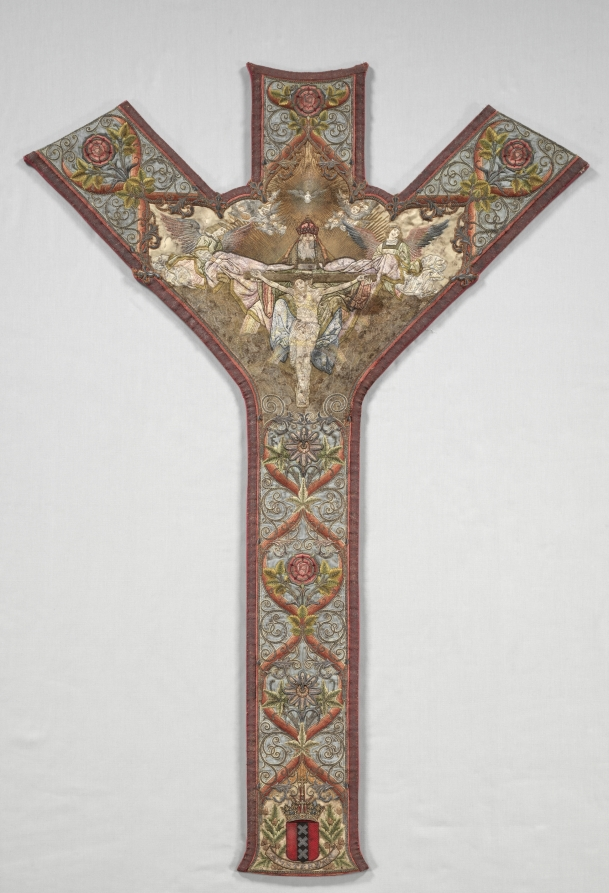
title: Orphrey Band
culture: Netherlands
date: 1800s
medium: Silk, gold and silver filé; embroidery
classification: Embroidery